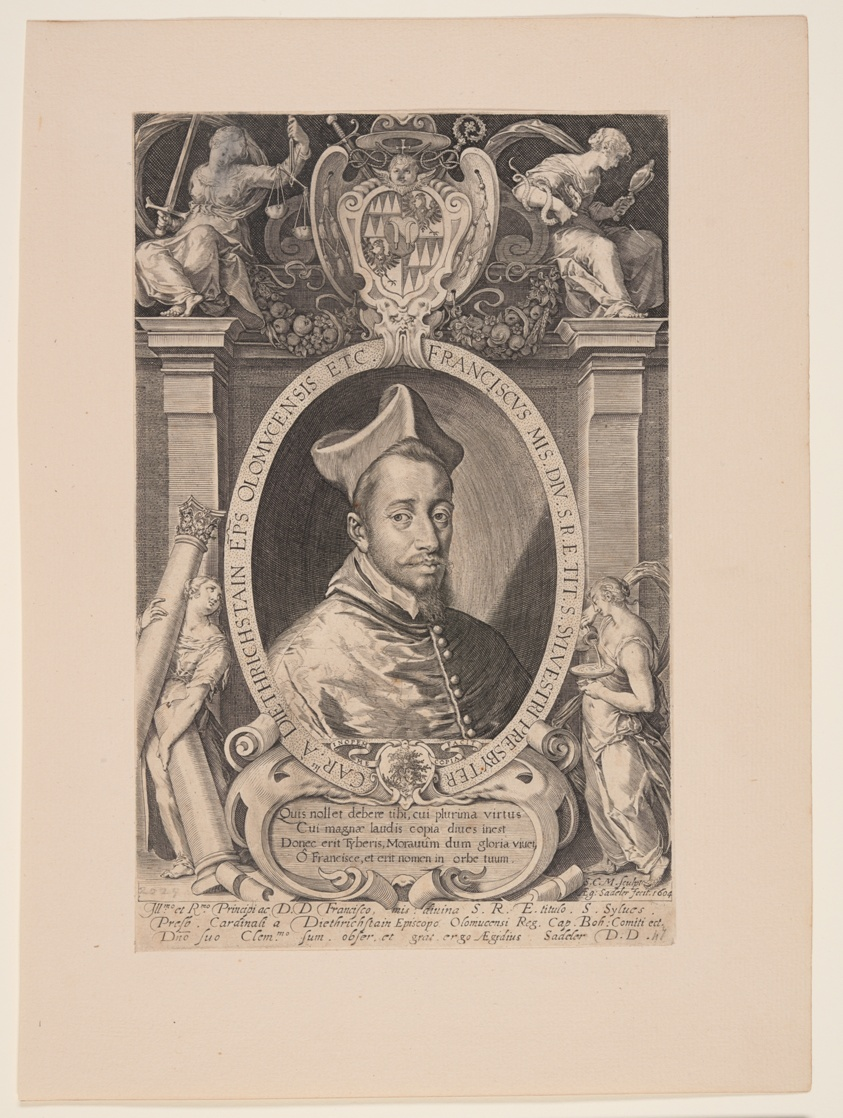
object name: Print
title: Franz von Dietrichstein, Bishop of Olmütz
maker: Aegidius Sadeler II; Flemish, c. 1570–1629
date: 1604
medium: Engraving on paper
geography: Flanders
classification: engraving; paper; print; prints and drawing